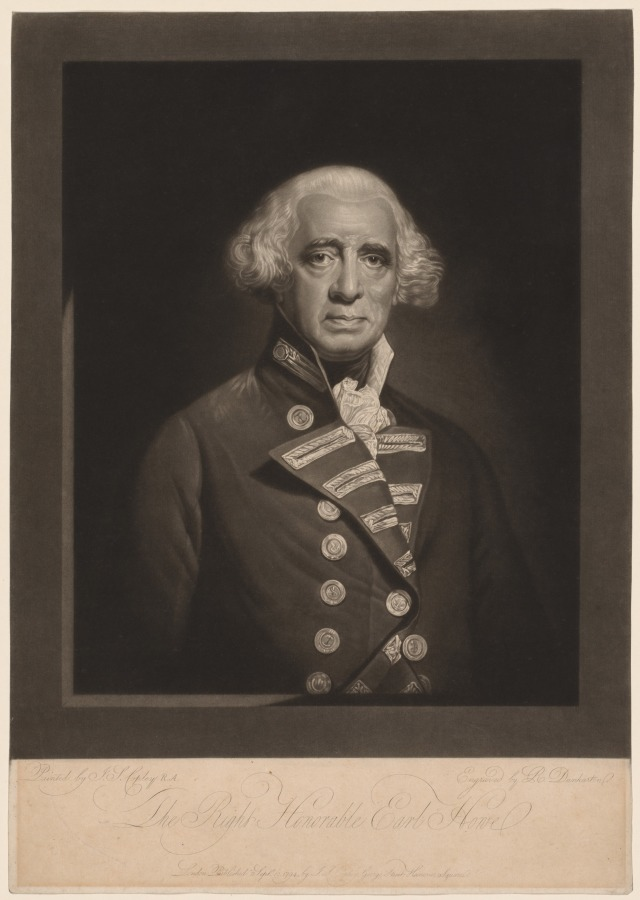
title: Richard, Earl Howe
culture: England, 18th century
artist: Robert Dunkarton (British, 1744-c. 1817)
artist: after John Singleton Copley (American, 1738–1815)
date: 1794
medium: mezzotint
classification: Print